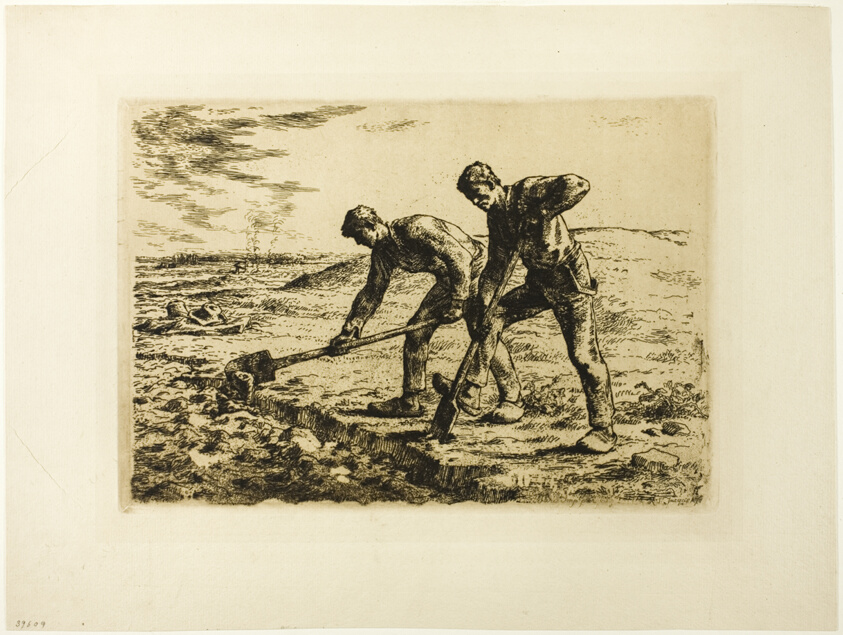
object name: Print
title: Two Men Digging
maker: Jean François Millet (French, 1814-1875); printed by Auguste Delâtre (French, 1822-1907)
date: 1855–56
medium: Etching in dark brown ink on cream laid paper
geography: France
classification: etching; print; prints and drawing